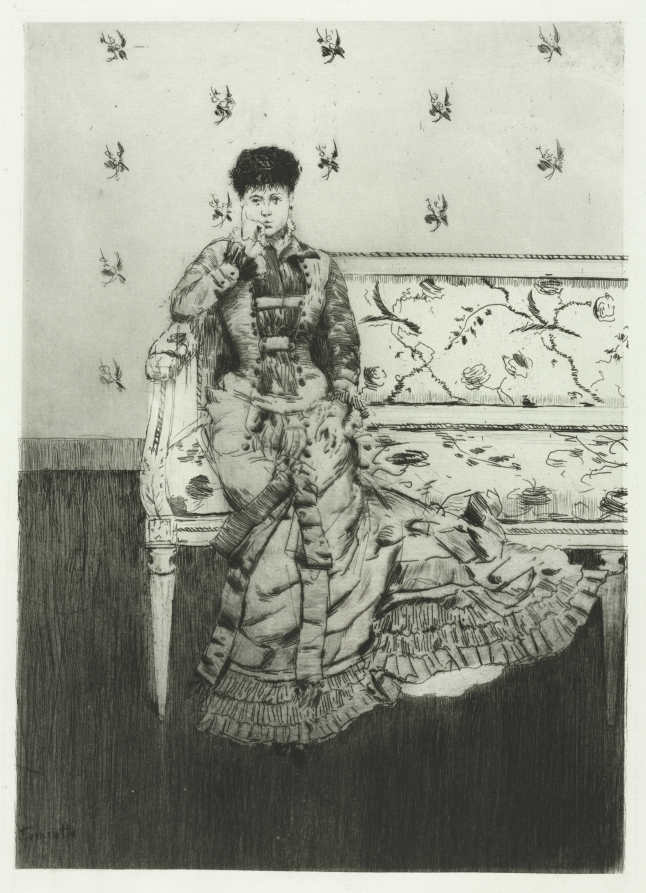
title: Fancy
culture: France, 19th century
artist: Norbert Goeneutte (French, 1854–1894)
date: 1877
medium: etching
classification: Print